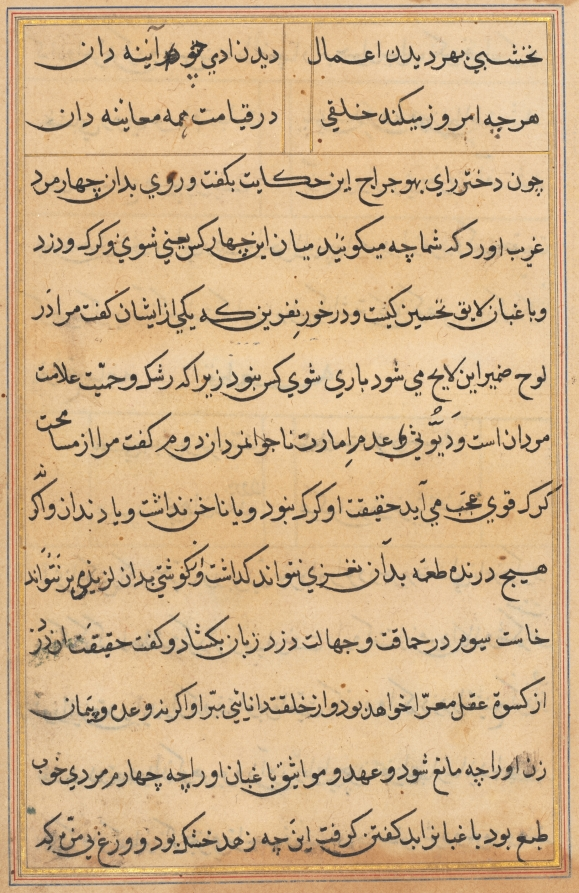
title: Page from Tales of a Parrot (Tuti-nama): text page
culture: Mughal India, court of Akbar (reigned 1556–1605)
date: c. 1560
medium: gum tempera, ink, and gold on paper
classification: Painting